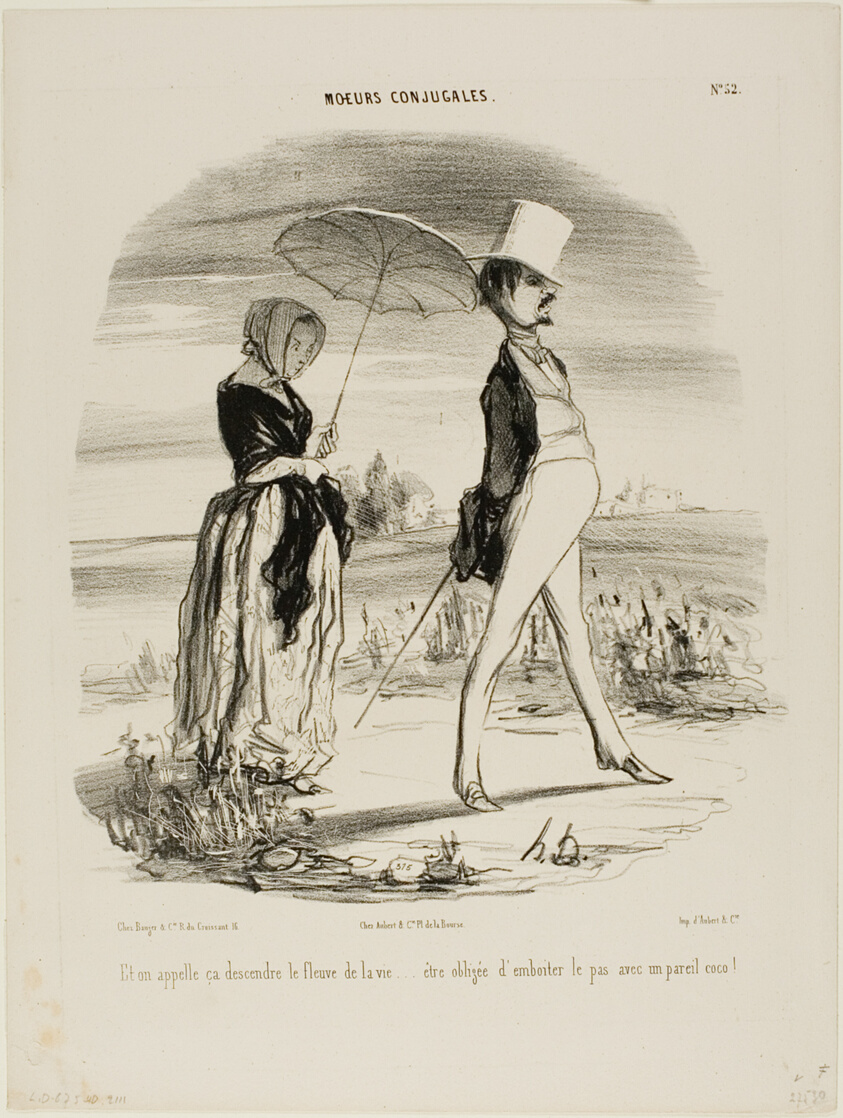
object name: Print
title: “So this is what's called following the stream of life..... to be compelled to march lockstep with such a fool!,” plate 52 from Moeurs Conjugales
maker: Honoré Victorin Daumier; French, 1808-1879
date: 1842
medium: Lithograph in black on white wove paper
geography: France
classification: lithograph; print; prints and drawing